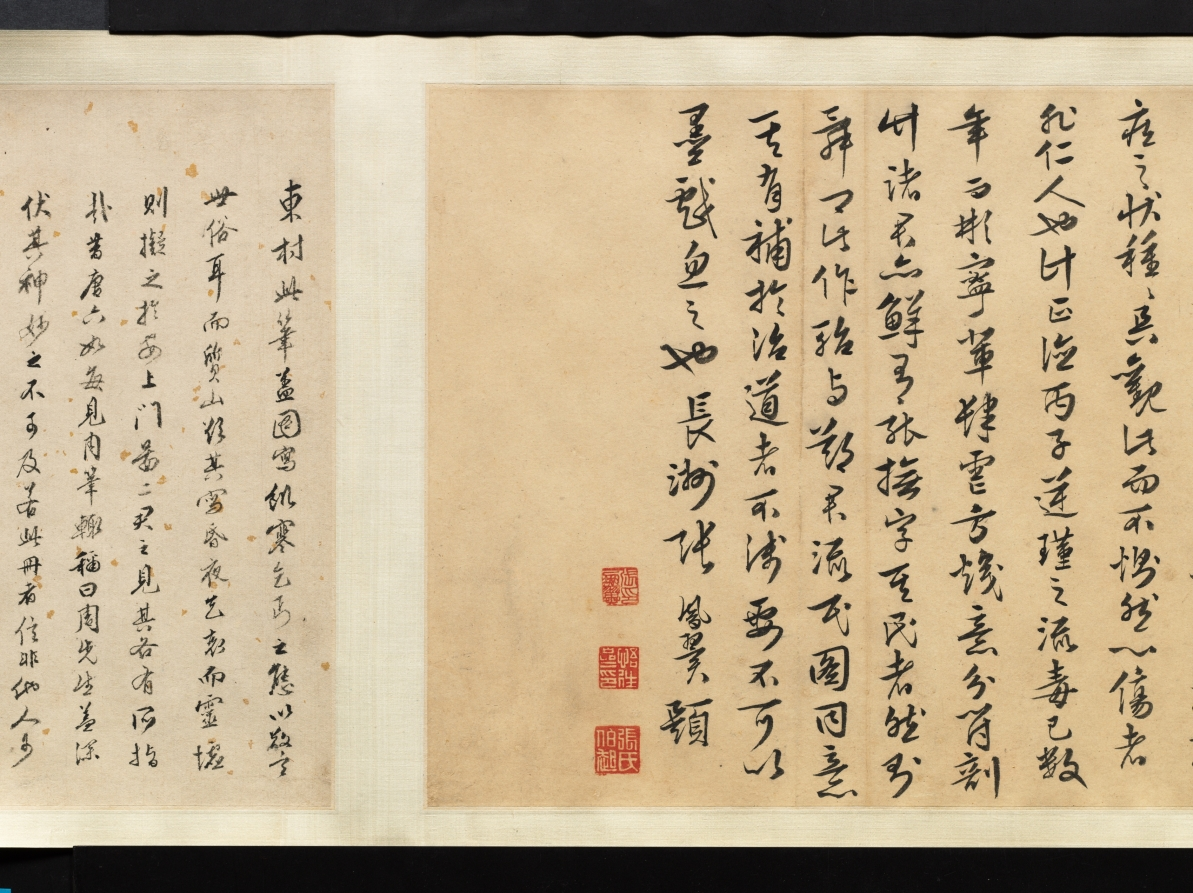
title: Beggars and Street Characters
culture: China, Ming dynasty (1368–1644)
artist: Zhou Chen (Chinese, c. 1450–c. 1536)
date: 1516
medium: Handscroll; ink and light color on paper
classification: Painting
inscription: 題: 周臣流氓圖. 古堇趙鶴琴 [印] 老鶴臨池; 鵝池軒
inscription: 正德丙子秋七月，閒窗無事 ，偶記素見市道丐者種種態度。乘筆硯之便，率爾圖寫。雖無足觀，亦可以助警勵世俗云。 東邨周臣記 [印]東邨; 舜卿; 鵝場散人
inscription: 吳中東邨周君，善丹青，尤長於人物。此圖其所見盛市丐者之狀種種，各盡其態，觀者絕倒。嗟乎，今之晝夜乞哀以求富貴者，安得起周君而貌之耶。臥雲徵君出示，余漫題其後。 甲子歲十月吳門黃姬水 [印] 士雅山人; 另一印不詳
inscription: 是冊凡數種。其飢寒流離疲癃殘疾之狀，種種之異。觀此而不惻然心傷者，非仁人也。計正德丙子逆瑾之流毒已數年。而[江]彬 [錢] 寧輩肆虐方熾。意分符剖竹諸君，亦鮮有能撫字其民者。然則舜卿此作，殆與鄭君 流民圖同意。其有補於治道者不淺，要不可以墨戲忽之也。 長洲張風翼題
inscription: 東村此筆，蓋圖寫飢寒乞丐之態，以警世俗耳。而質山 [黃姬水]欲其寫昏夜乞哀，而靈墟[張鳳翼]則擬之於安上門圖。二君之見，其各有所指哉。昔唐六如每見周筆，輒稱曰：周先生！蓋深服其神妙之不可及。若此冊者，信非他人可能而有符於六如之心伏矣。豈易得耶。若黃、張之指，則又論於畫之外，不在於形似筆墨之旨也。 萬歷丁丑十二月三日 茂苑文嘉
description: Zhou Chen from Suzhou provides rare depictions of impoverished people that once filled the city’s markets and streets. Despite Suzhou’s prosperity, its rapid growth polarized society, including the wealthy and those who had deserted their farmlands, who were without homes, unemployed, or sick. Amid these are figures who inspire fear rather than empathy. The painting may thus be informed by local practices at the end of the lunar year, in which street beggars, in exchange for food or money, would dress up like ghosts and demons to drive out evil forces.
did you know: Although Zhou Chen's original composition was an album of 24 figures, today it is mounted as two handscrolls, one in the Cleveland collection and one in the Honolulu Museum of Art.